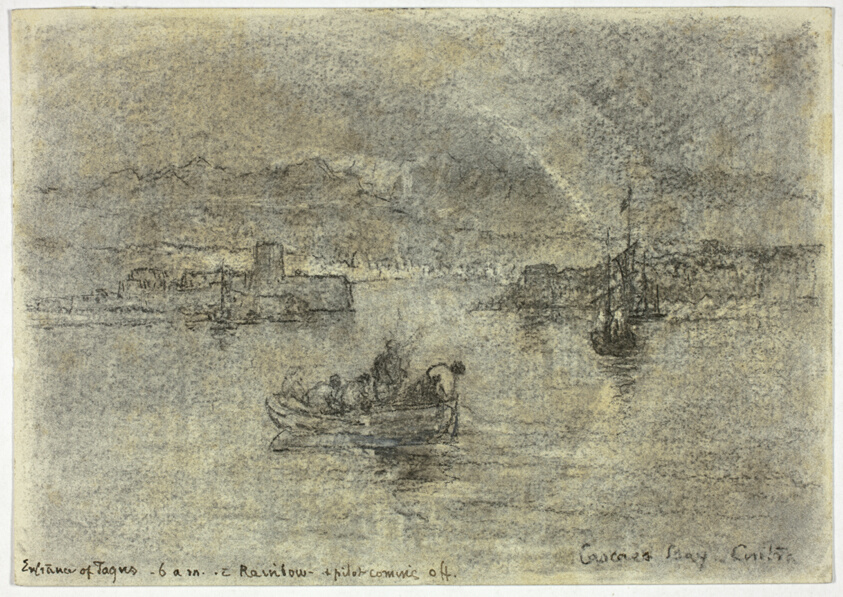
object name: Drawing and Watercolor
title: Rainbow over Cascais Bay, Cintra, Portugal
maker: Francis Seymour Haden (English, 1818-1910)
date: 1877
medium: Charcoal with traces of white chalk on ivory wove paper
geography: England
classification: charcoal; drawings (visual works); prints and drawing